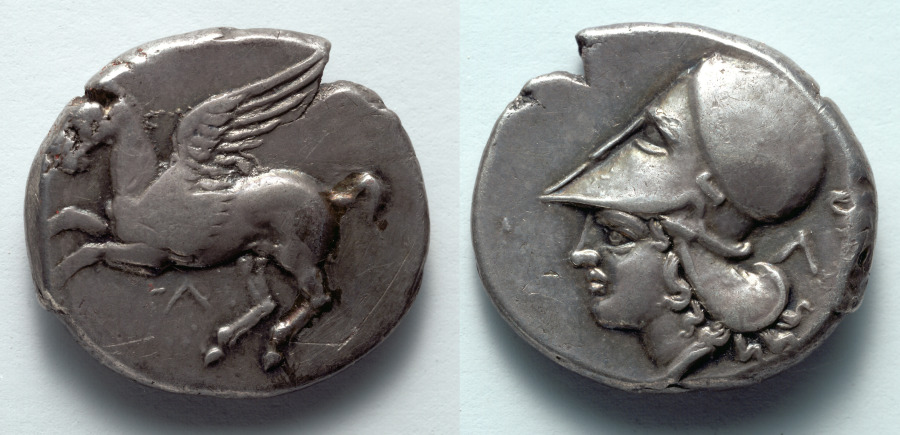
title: Stater: Pegasos (obverse); Head of Athena (reverse)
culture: Greek, minted at Leukas (Akarnania)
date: c. 350–300 BCE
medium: silver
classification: Coins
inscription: Λ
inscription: Λ